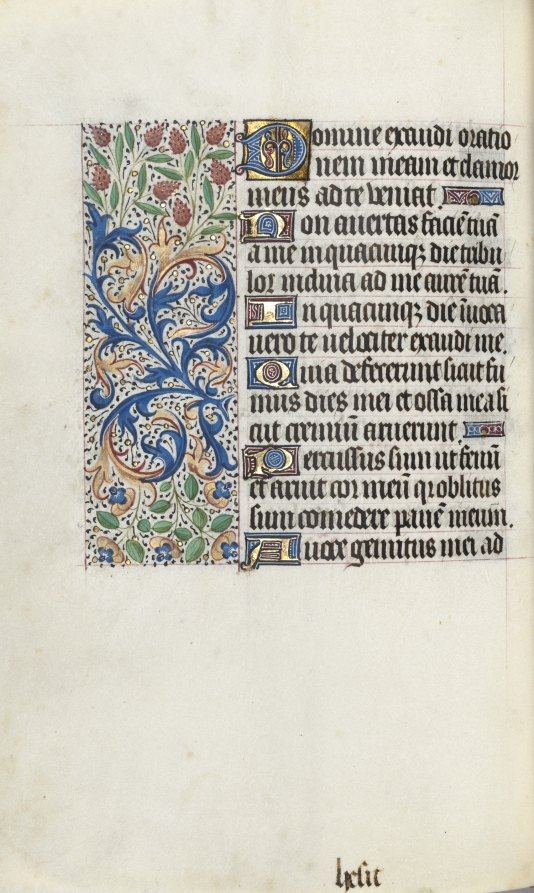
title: Book of Hours (Use of Rouen): fol. 87v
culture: France, Rouen, 15th century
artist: Master of the Geneva Latini (French, active Rouen, 1460–80)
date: c. 1470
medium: ink, tempera, and gold on vellum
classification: Bound Volume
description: In the late 1400s and early 1500s Rouen was an established and important center of book production. The city’s cathedral had a wealthy chapter that spent large sums of money to commission books and to maintain its extensive library. The stationers and booksellers would have likely been concentrated in or near the cathedral precinct. This artist, named after a manuscript now in Geneva, was Rouen’s principal illuminator during the second half of the 1400s.